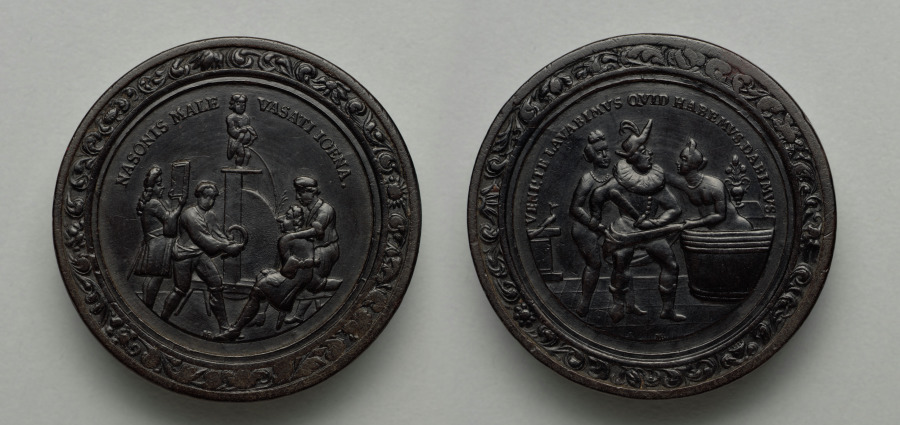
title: Gaming Piece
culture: Germany, late 17th-early 18th Century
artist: Martin Brunner (German, 1659–1725)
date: c.1700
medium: wood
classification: Furniture and woodwork